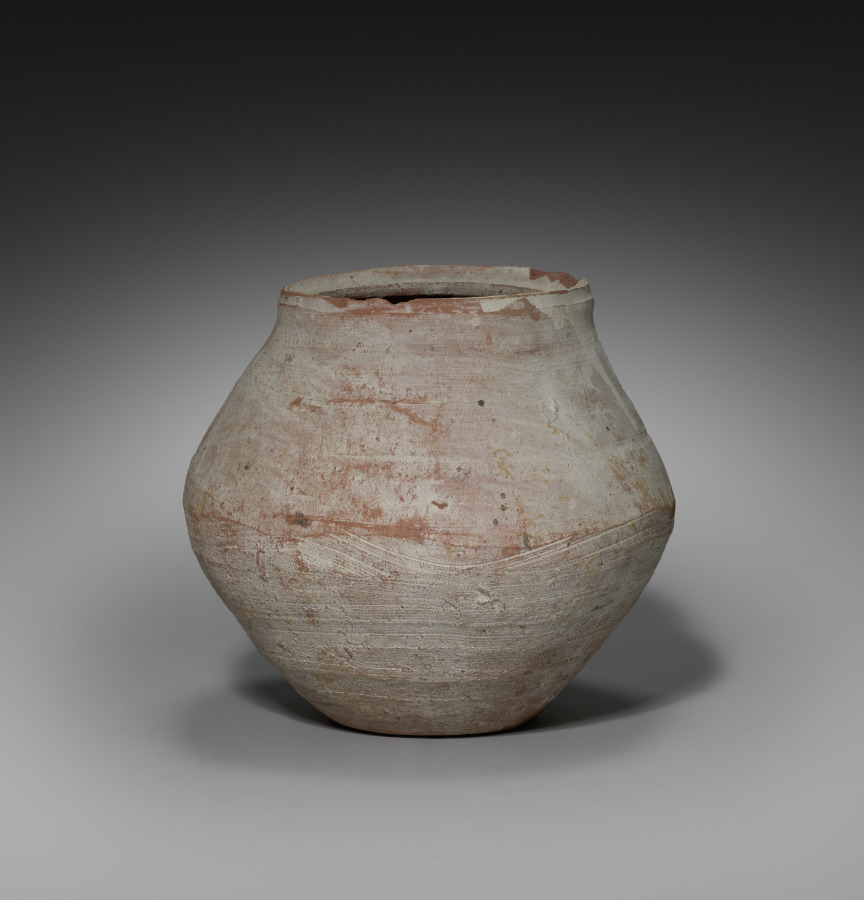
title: Shawabty Jar with Lid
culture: Egypt, New Kingdom (1540–1069 BCE), Dynasties 19–20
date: 1295–1069 BCE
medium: Nile silt ware; lid of limestone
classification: Funerary Equipment